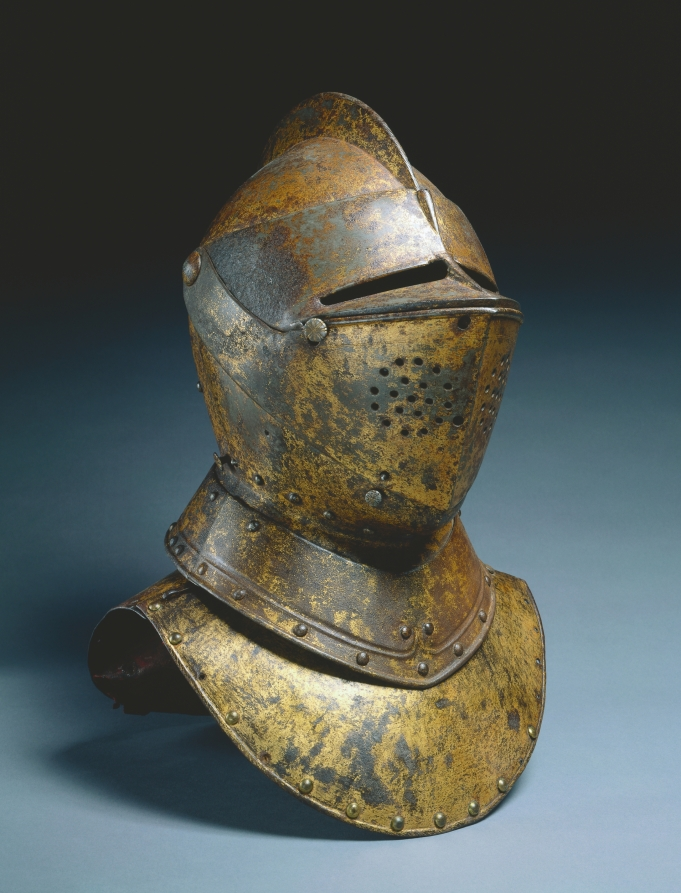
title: Gorget (from a funerary achievement?)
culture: Netherlands(?), late 16th-early 17th Century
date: c.1590–1625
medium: gilded steel (invaded with rust); red velvet lining, plume holder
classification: Arms and Armor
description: This helmet was originally intended for field use. Later, it seems to have served a funerary purpose, probably as an ornament (known as a funerary achievement) suspended over the church tomb of an unidentified knight. As such, it would have been a rich and imposing symbol of the dead knight's social rank and personal authority.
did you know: This helmet and gorget has been decorated by fire-gilding, an extremely toxic process that produced a look of great luxury.